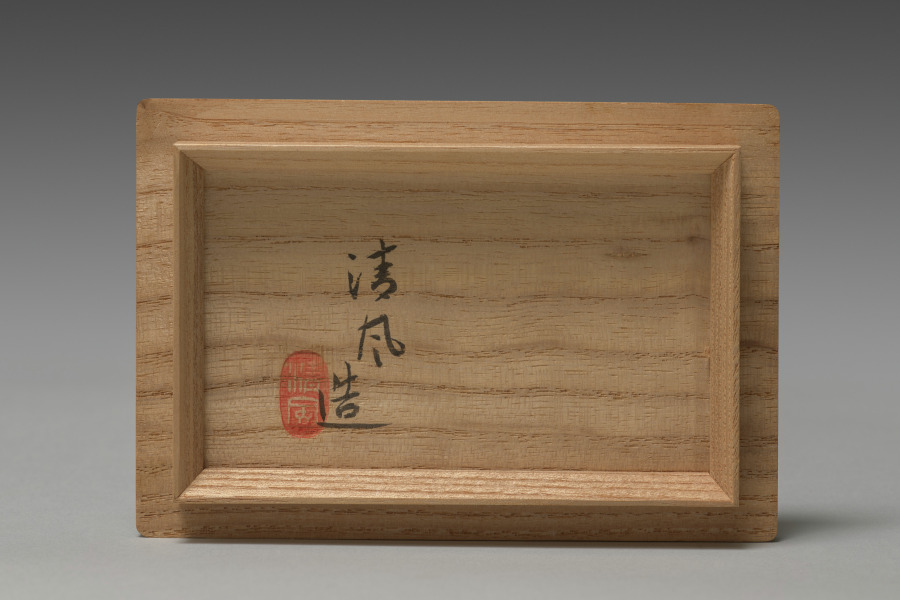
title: Sake Pourers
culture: Japan, Taishō period (1912–26) or Shōwa period (1926–89)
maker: Seifū Yohei IV (Japanese, 1872–1951)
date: 1914–46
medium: Pair of sake pourers; porcelain with yellow glaze and bamboo handles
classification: Ceramic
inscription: 清風造 。 【印】 清風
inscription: 成山清風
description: Like his father, Yohei IV also produced works with red or yellow monochrome glazes. His yellow-glazed works include this pair of sake pourers, a set of five drinking cups CMA 2022.217, and a sweets bowl molded into the shape of a chrysanthemum CMA 2022.218.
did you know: The lid's handle is made of bamboo.